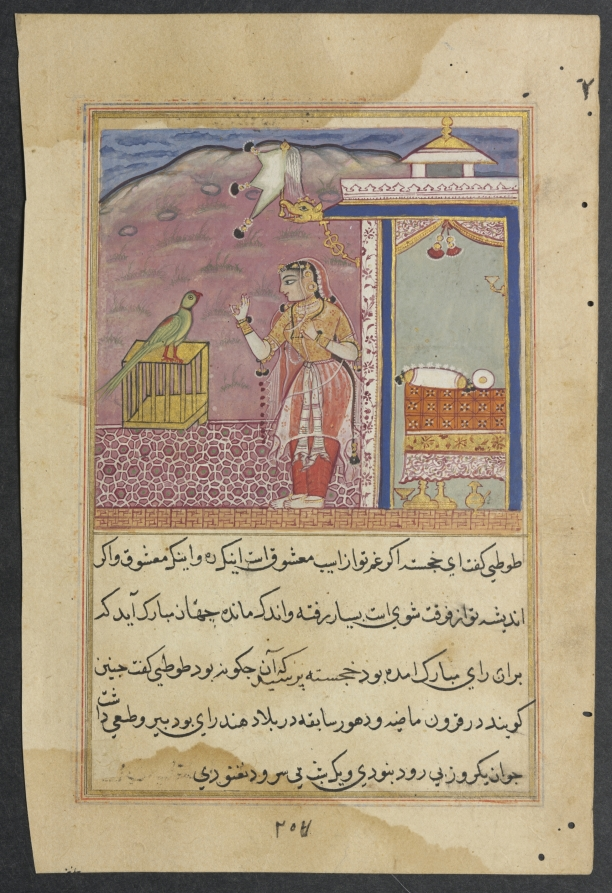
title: The parrot addresses Khujasta at the beginning of the forty-fourth night, from a Tuti-nama (Tales of a Parrot)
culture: Mughal India, court of Akbar (reigned 1556–1605)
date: c. 1560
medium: gum tempera, ink, and gold on paper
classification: Painting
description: Standing against a brightly colored landscape, Khujasta consults with Tuti, the clever, talking parrot. He tells her the story of a raja whose children planned to kill him and the musician whose words brought them to their senses. This image is composed of the pale tones that were popular in a pre-Mughal Indo-Persian painting style.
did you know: The flag at the end of the eave is held in the snout of a Ganges crocodile head.